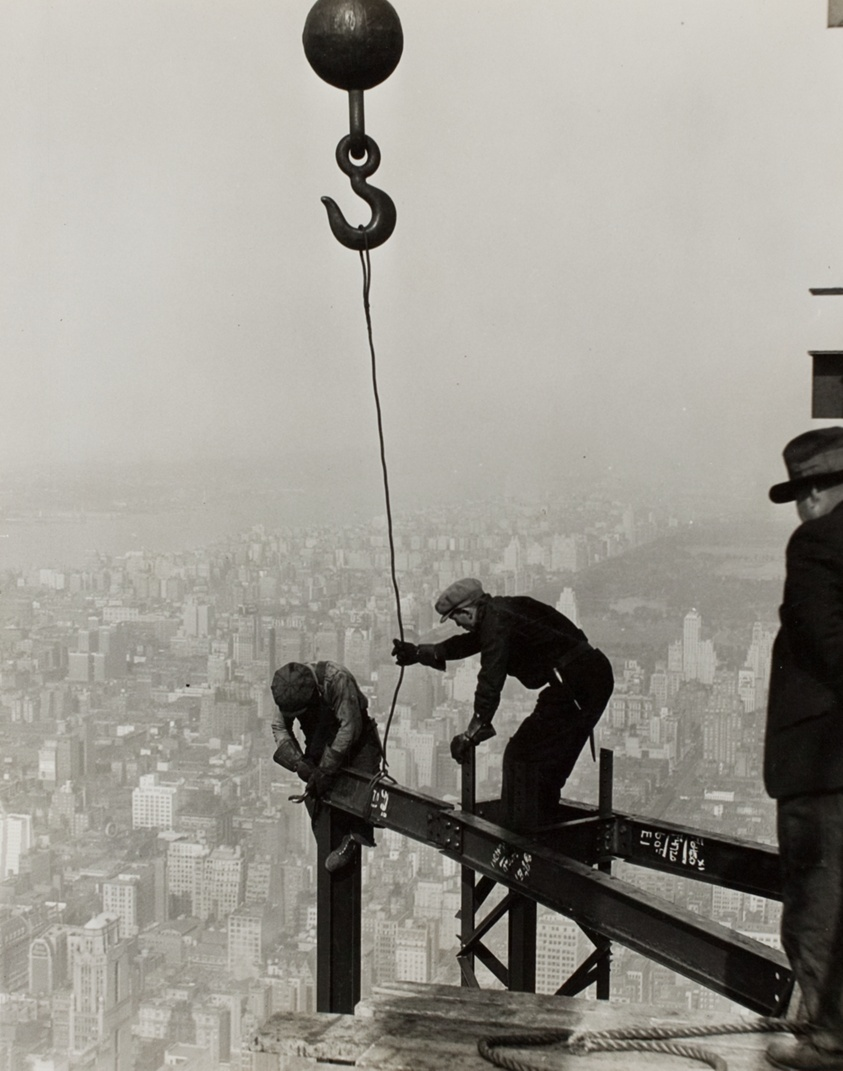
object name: Photograph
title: High on the Empire State Building, N.Y.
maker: Lewis Wickes Hine (American, 1874–1940)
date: 1930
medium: Gelatin silver print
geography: United States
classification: photograph; photography